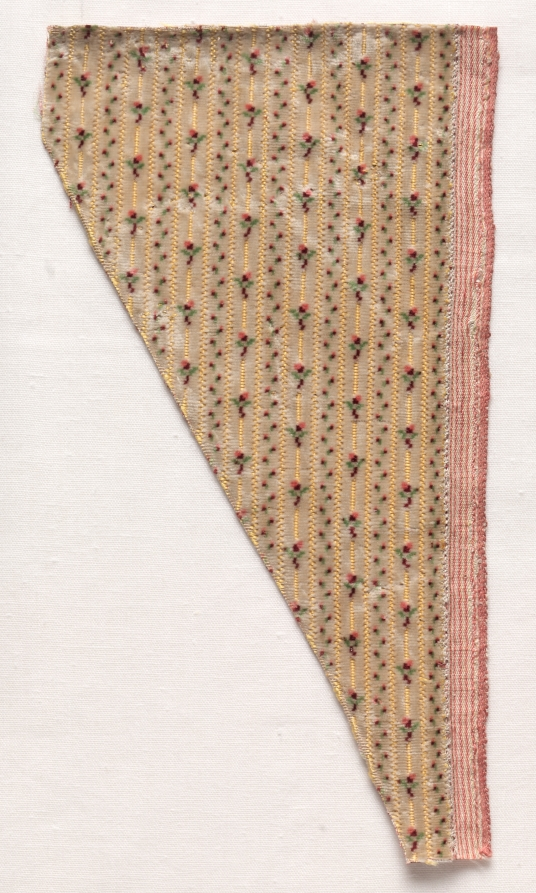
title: Textile Fragment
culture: France, late 18th century, Period of Louis XVI (1774-1793)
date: 1774–1793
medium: velvet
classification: Velvet